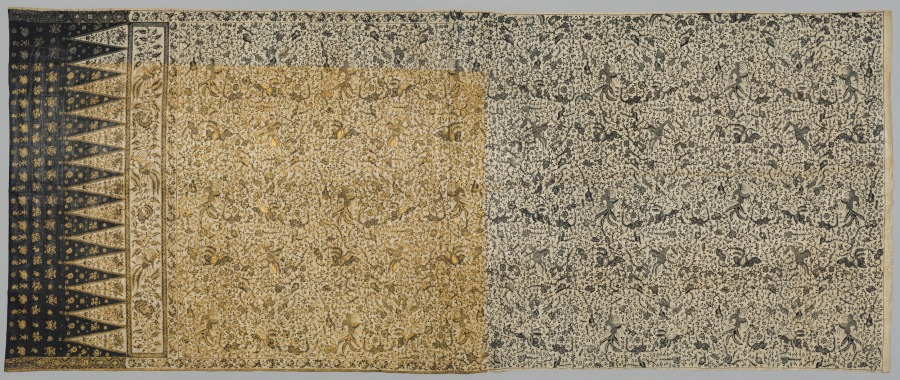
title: Sarong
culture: Indonesia, Java, North Coast, 19th century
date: 1800s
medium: batik and applied gold, cotton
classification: Textile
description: This sarong, overlaid with gold leaf (or gold dust), would have been worn for high ceremonial occasions and festivals. The gold has been applied only to the parts of the sarong that would show when draped, and on one side only. The delicate, linear design with Chinese phoenixes, butterflies, and leafy tendrils is one of the characteristic styles of batiks made in cities along the north coast of Java. The "tumpal" (triangle) design of the wide end border (a pan-Southeast Asian motif that commonly occurs on northern Javanese batiks) seems to have symbolized growth and fertility as well as the sacred mountain, Meru.